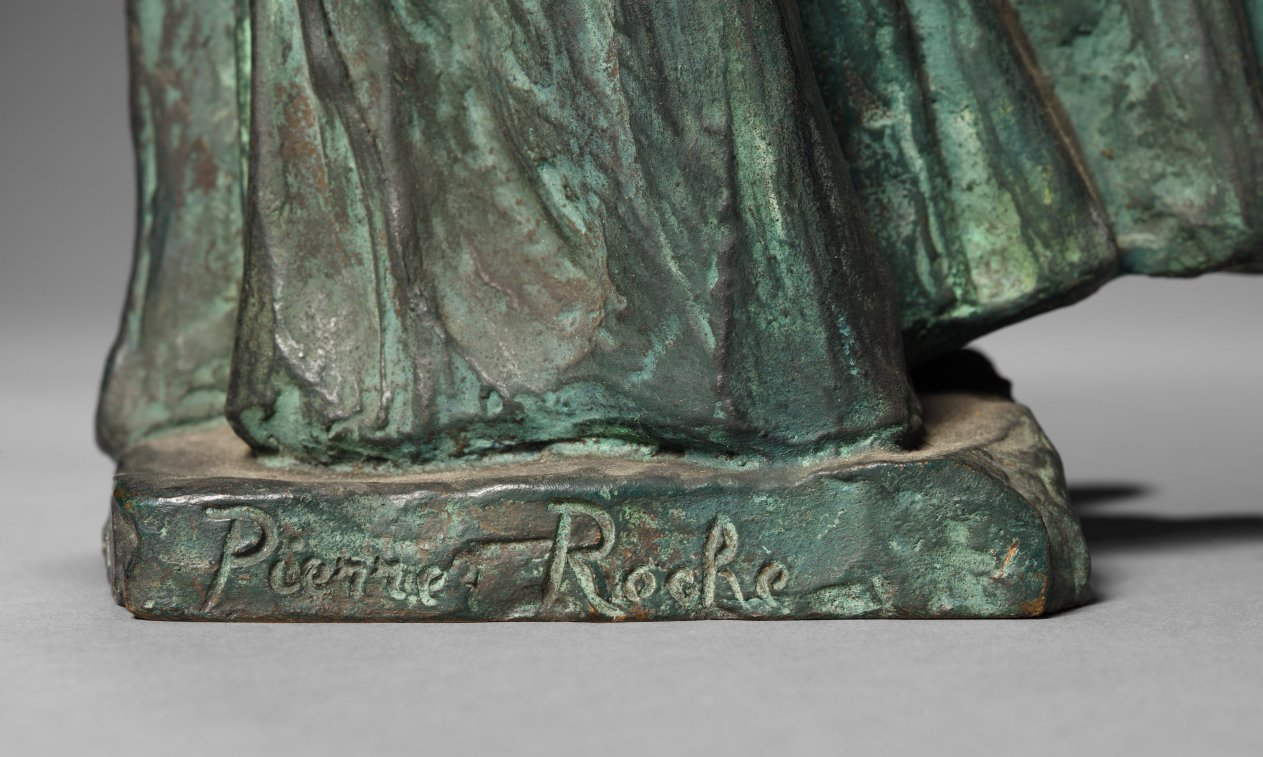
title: Loïe Fuller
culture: France, 19th-20th century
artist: Pierre Roche (French, 1855–1922)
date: c. 1900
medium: bronze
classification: Sculpture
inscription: Inscribed on the face of the base: "Loïe Fuller" and at the right, signature of the artist